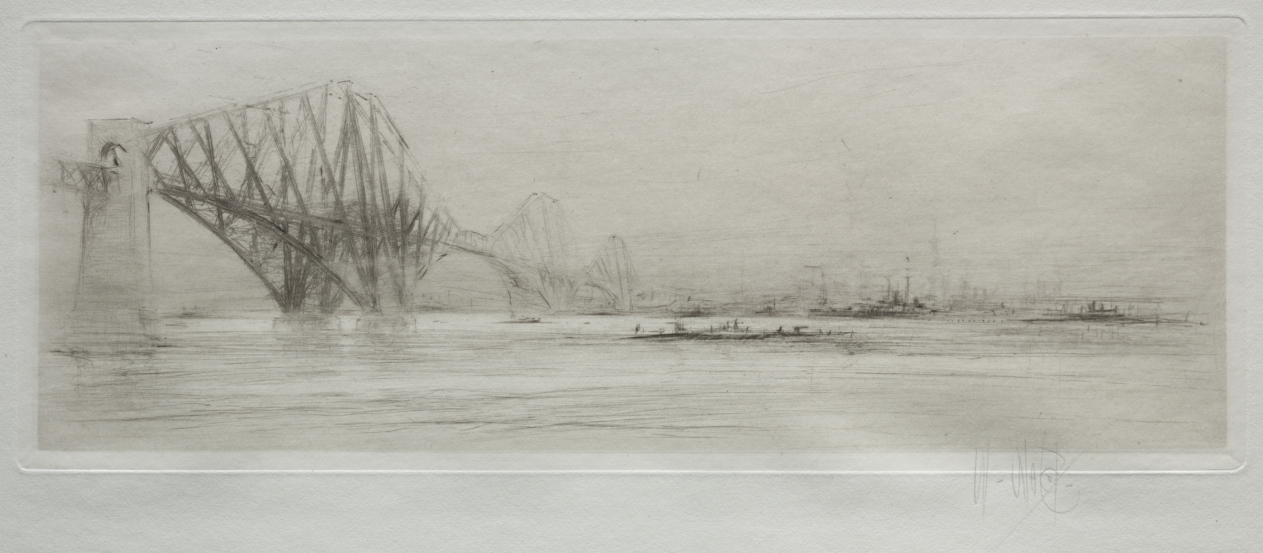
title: Arteries of Great Britain: The Forth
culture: England, 20th century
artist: William Walcot (British, 1874–1943)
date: 1922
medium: drypoint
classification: Print